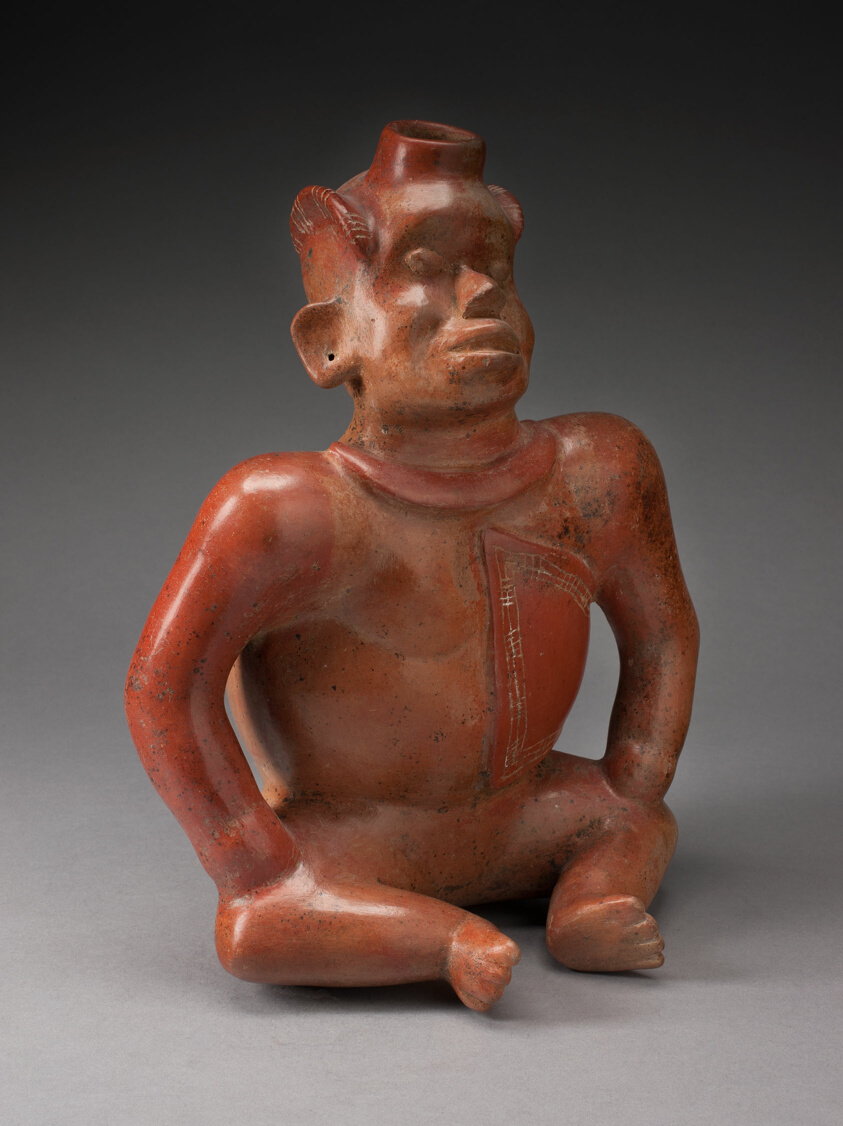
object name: Vessel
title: Vessel in the Form of a Seated Hunchback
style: colima, mesoamerican, Arts of the Americas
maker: Colima (Colima, Mexico)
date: 100 BCE–250 CE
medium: Ceramic and pigment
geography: Colima state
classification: vessel; art of the americas; ceramics